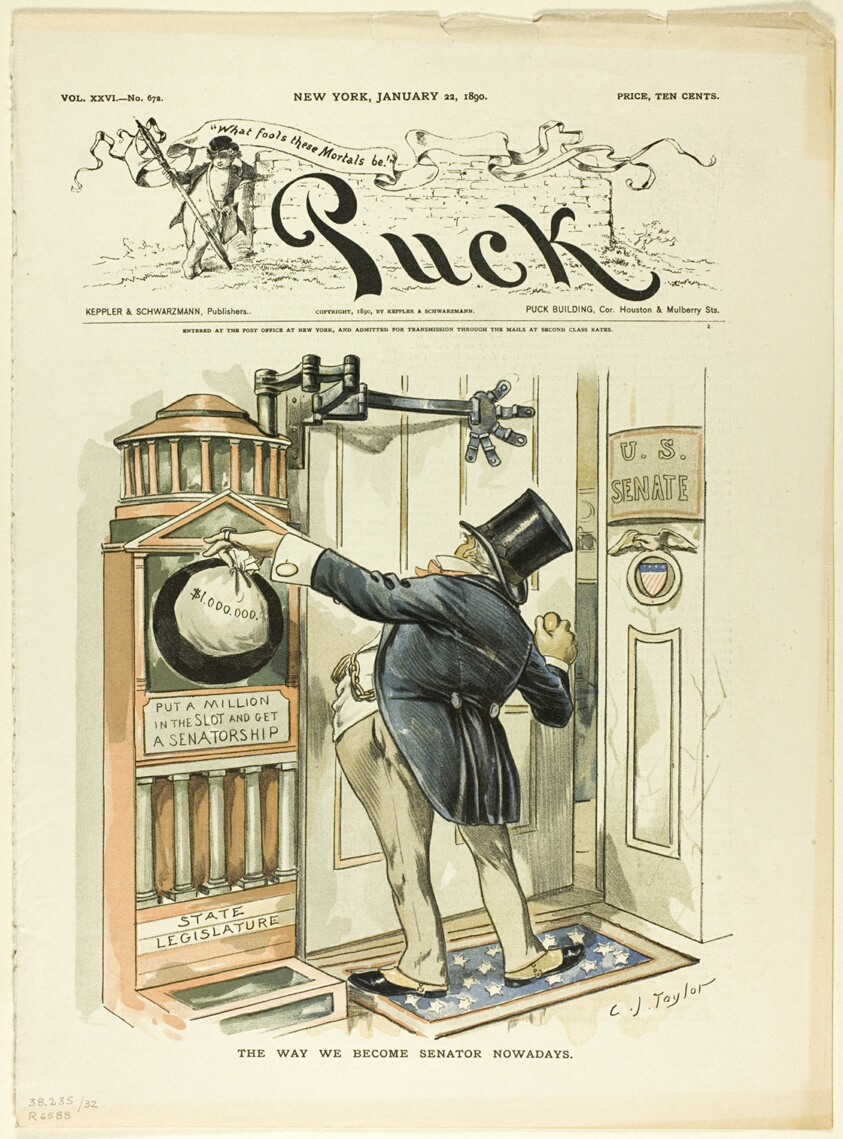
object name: Print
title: The Way We Become Senators Nowadays, from Puck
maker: C. Jay Taylor (American, 1855-1929)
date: 1890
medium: Color lithograph on newsprint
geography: United States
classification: lithograph; print; prints and drawing